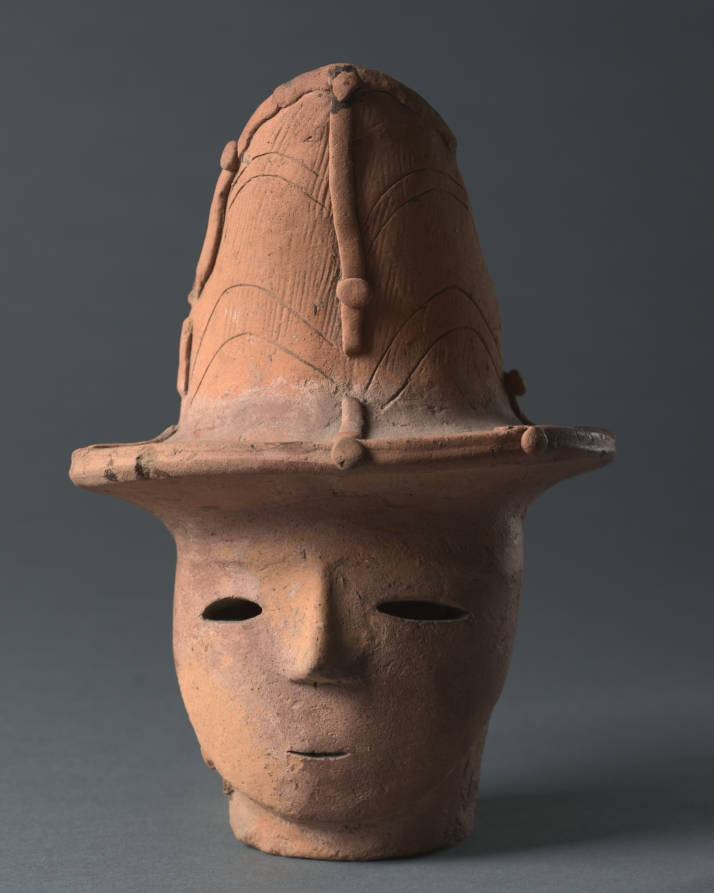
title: Male Haniwa Head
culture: Japan, Kofun period (300–710 CE)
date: c. 500–600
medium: earthenware with ochre wash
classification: Sculpture